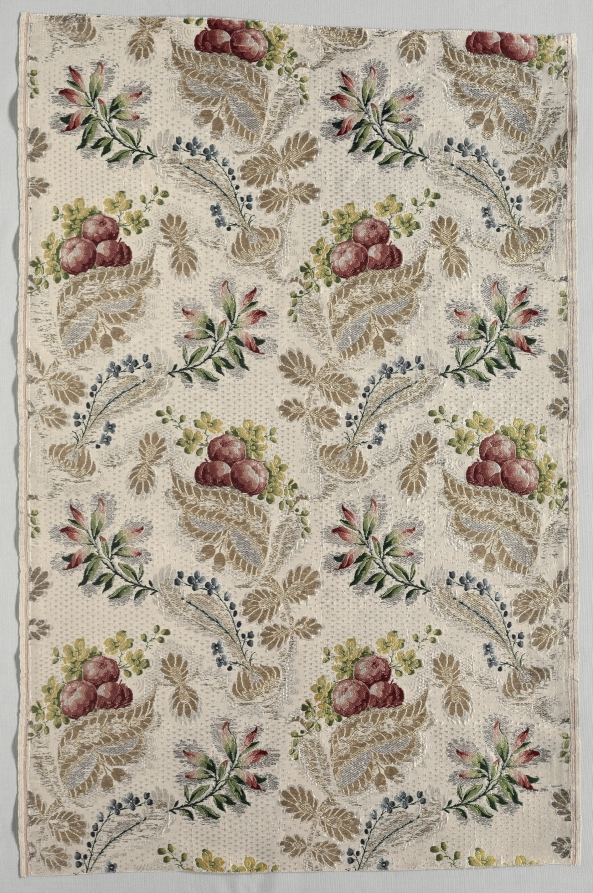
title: Textile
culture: France, 18th century, Period of Louis XV (1723-1774)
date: 1723–1774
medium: taffeta, brocaded; silk, silver, and gold thread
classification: Textile